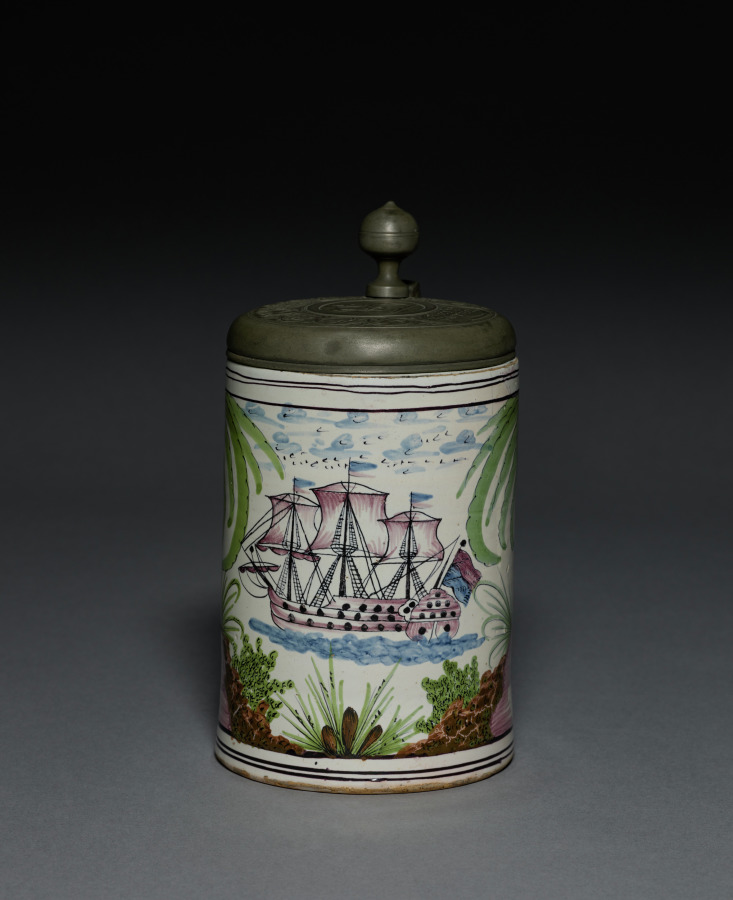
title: Tankard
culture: Germany, Aumund (Vegesack), 18th century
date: c. 1750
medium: faience with pewter cover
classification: Ceramic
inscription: inscribed on pewter cover: "Johan/Grother" (probably name of first owner).